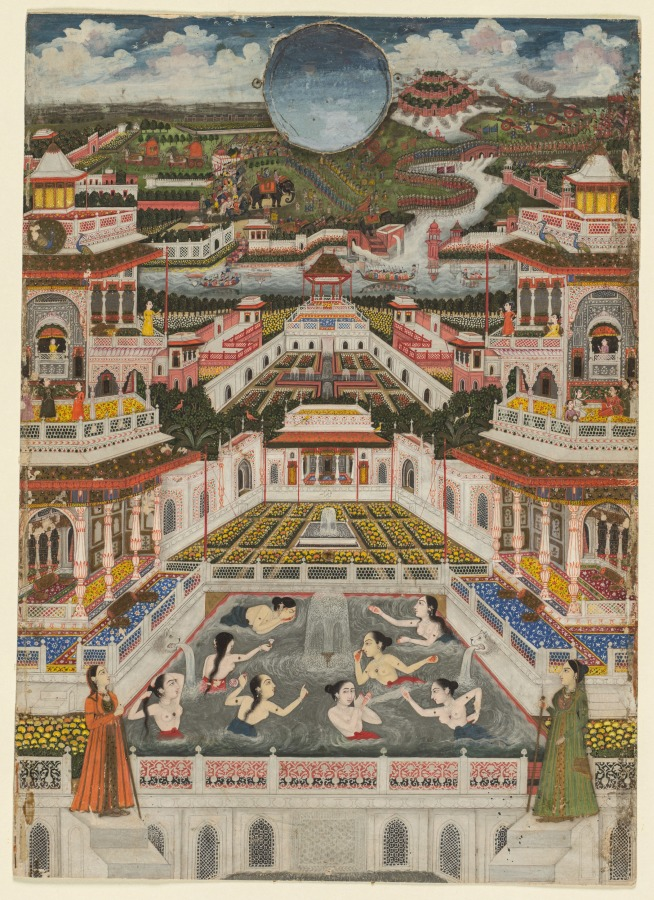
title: Women bathing before an architectural panorama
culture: India, Lucknow, Mughal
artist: Fayzullah (Indian, active c. 1730–1765)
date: c. 1765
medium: Gum tempera and gold on paper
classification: Painting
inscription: Persian inscription in center, on marble balustrade, in nasta‘liq script: The work of Fayzullah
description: Despite the wars waged and forts besieged in the background, life in the palace is carefree and luxurious. Some women enjoy hookahs and music on balconies, while others swim and drink liquor with abandon from Chinese porcelain cups and bottles. The artist has placed his name under the central pavilion, observing the scene across a formal garden of marigolds. The artist seems to have enjoyed experimenting with the idea of perspective, learned from European sources. He created a rapidly receding space that telescopes the view from the intimate harem quarters to the distant battlefields.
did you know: The artist signed his name below the king’s seat that overlooks the garden vista.